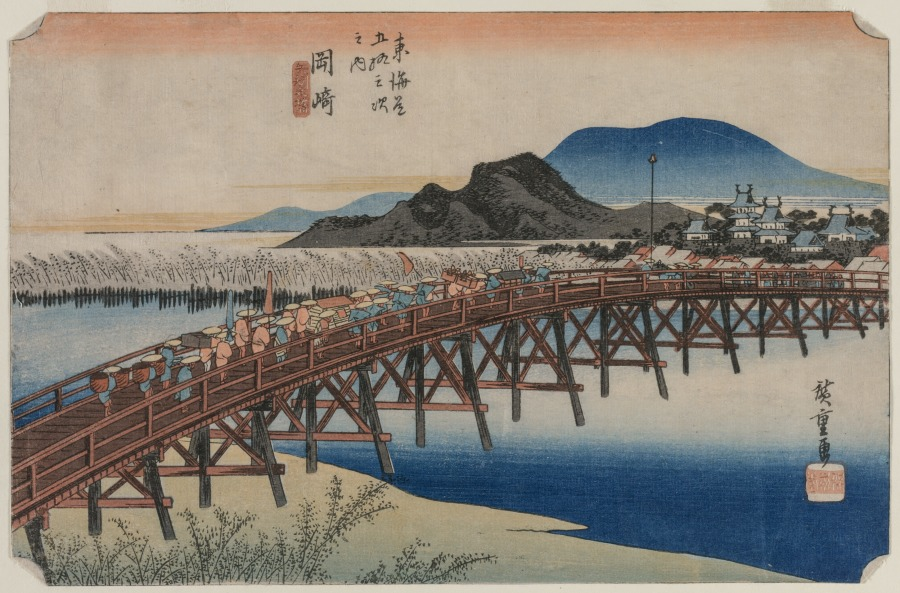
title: Yahagi Bridge at Okazaki (Station 39), From the series Fifty-Three Stations of the Tokaido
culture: Japan, Edo period (1615–1868)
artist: Utagawa Hiroshige (Japanese, 1797–1858)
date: 1833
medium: color woodblock print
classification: Print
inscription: Signature: Hiroshige ga Publisher: Takenouchi Magohachi (Hoeido)